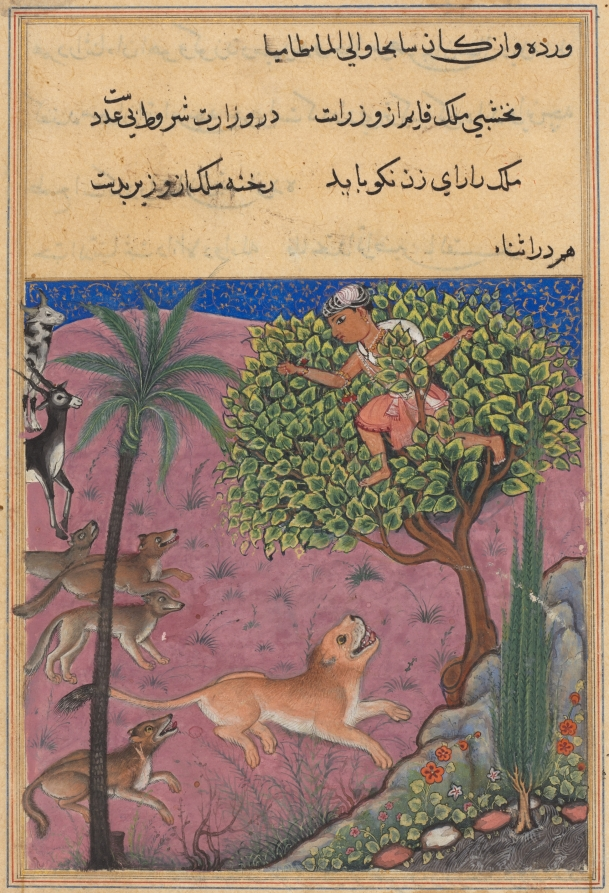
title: The wolf and the jackal, serving as viziers, instigate the lion who pursues the Brahman up a tree, from a Tuti-nama (Tales of a Parrot): Twenty-first Night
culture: Mughal India, court of Akbar (reigned 1556–1605)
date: c. 1560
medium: gum tempera, ink, and gold on paper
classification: Painting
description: The Brahman perches precariously at the top of a tree as the hungry lion waits below surrounded by wolves and jackals. Previously, the lion’s other viziers, the deer and the gazelle, had counseled the lion to treat the Brahman with kindness. They appear again to save the Brahman life.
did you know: The artist has depicted the gazelle and deer as a blackbuck and cow.